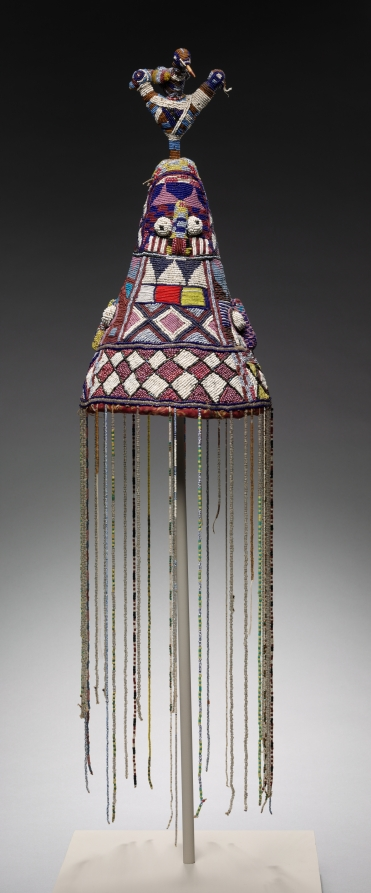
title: Crown (adéńlá)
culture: Africa, West Africa, Nigeria, Yorùbá-style maker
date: 1900s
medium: Cloth (probably cotton and wool), glass beads, reeds, cardboard, wood, plant fiber, cotton, and quills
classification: Garment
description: The most important of all regalia, topped with the "royal bird" Okin, this headdress connects the king to Oduduwa, the mythical founder of the Yoruba. The veil of beaded strings masks the identity of the wearer and protects his subjects from the supernatural powers that radiate from his face. The crown also signifies the "inner head" of the king, the locus of an awesome life force called ase.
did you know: No one––not even the king who wears it––is allowed to look inside this crown, as that's where it is most powerful.